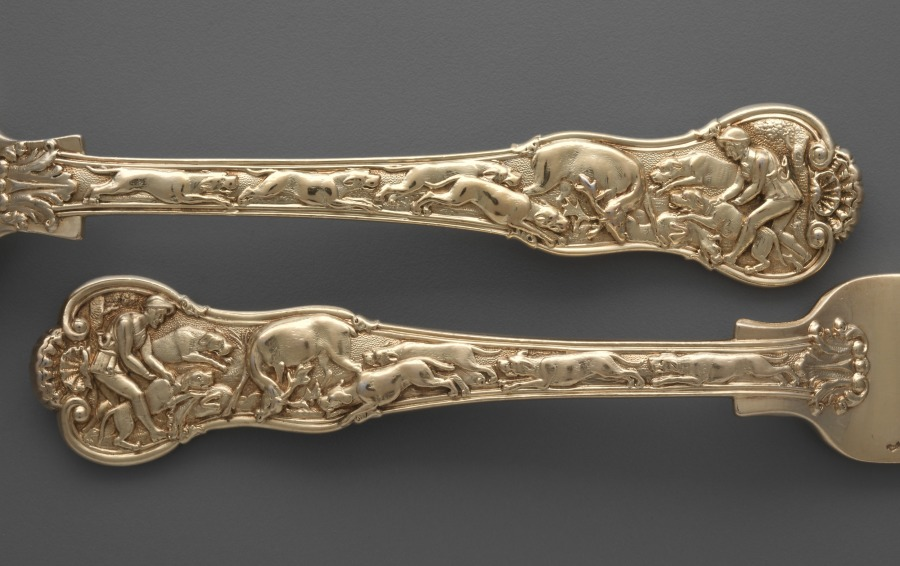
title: Dessert Fork and Spoon with Hunt Scenes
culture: England, London, 19th century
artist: Paul Storr (British, 1771–1844)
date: c. 1822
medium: gilt silver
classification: Silver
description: Paul Storr was perhaps the most famous and successful English silversmith working in the early 19th century. This fork and spoon were originally part of a larger set. The exceptionally high quality of the metalworking and gilding of these pieces is typical of Storr's work.